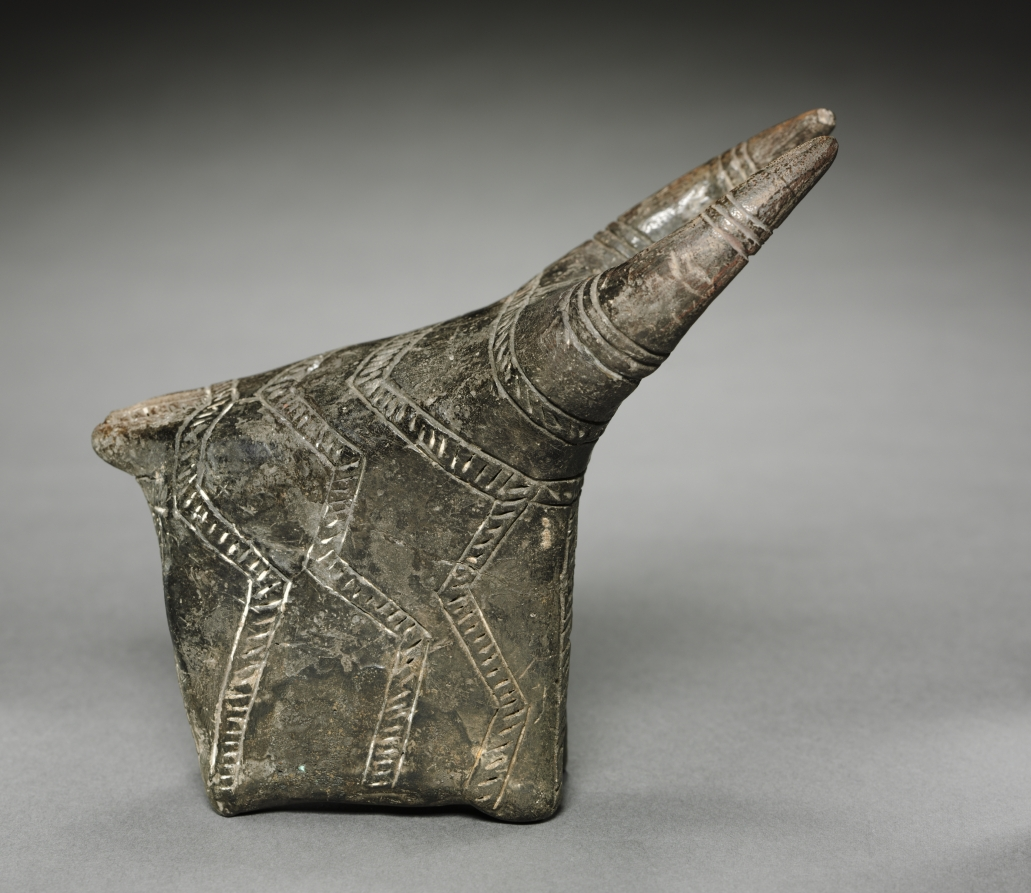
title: Bull Protome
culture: Cyprus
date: 2000–1000 BCE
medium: terracotta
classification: Ceramic